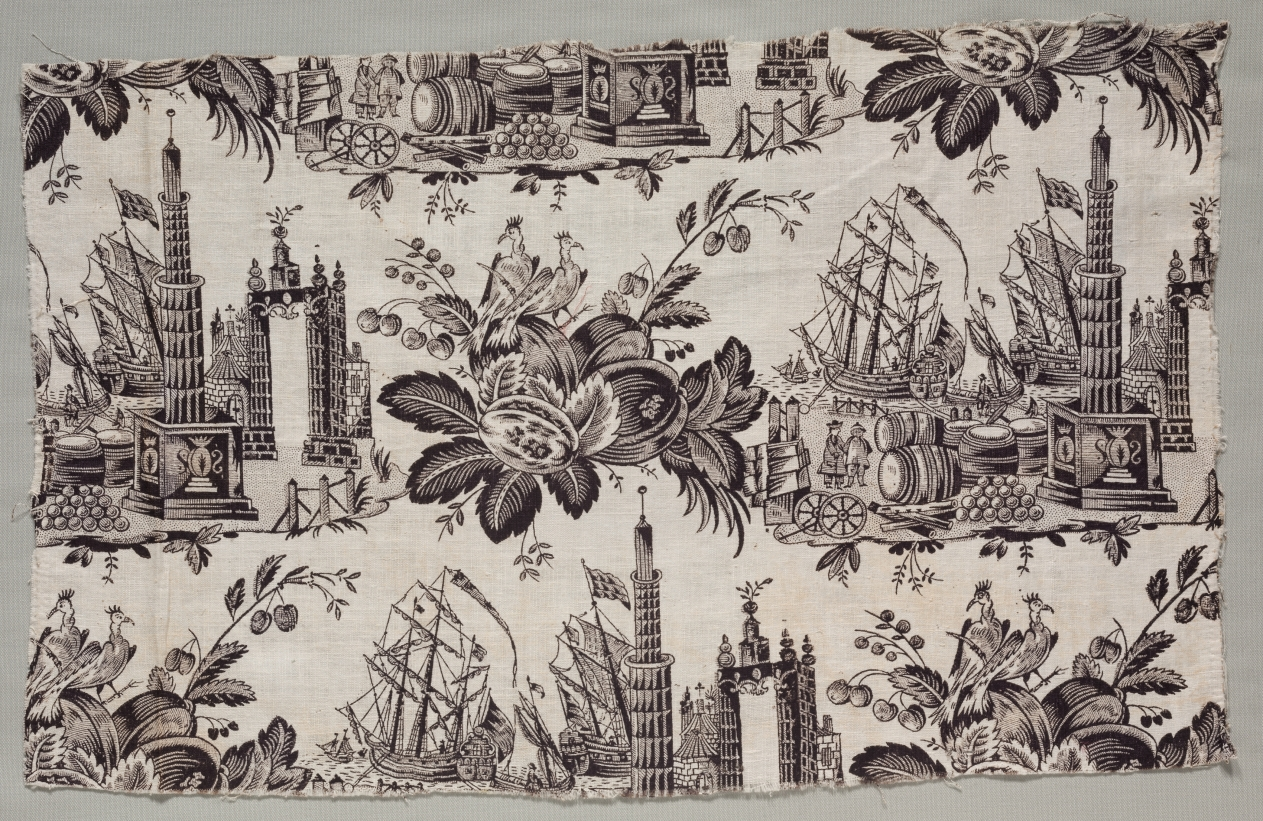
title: Fragment of Woodblock Printed Cotton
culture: France, late 18th century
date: 1770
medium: woodblock print on cotton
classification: Textile